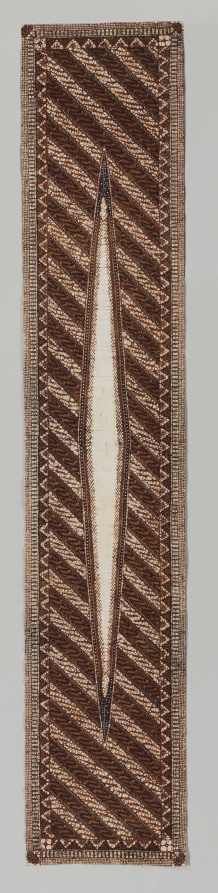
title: Slendang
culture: Indonesia, Central Java, 19th century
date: 1800s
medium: batik; cotton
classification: Textile